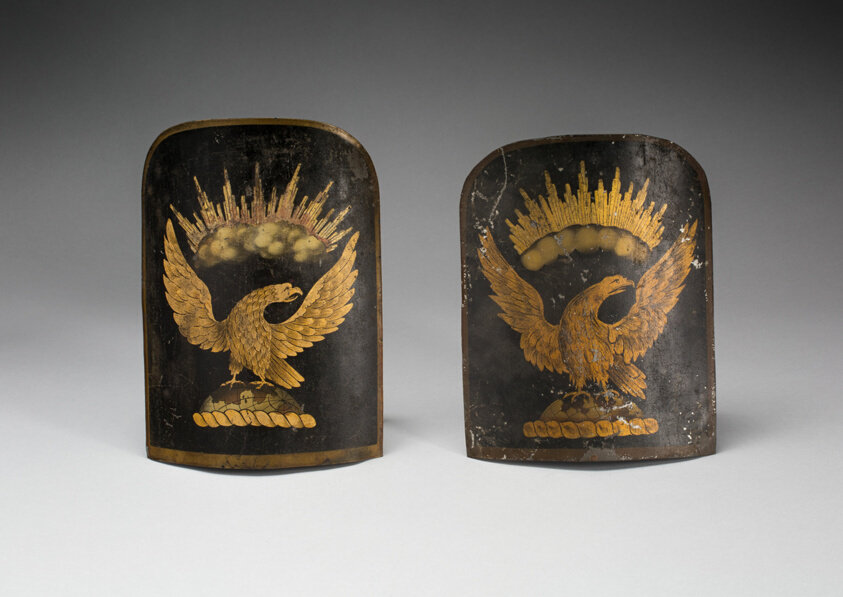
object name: Decorative Arts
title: Two Hat Plates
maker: Artist unknown (American, 19th century)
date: 1810–30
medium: Tin and paint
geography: United States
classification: metalwork; american decorative arts; american arts; decorative arts